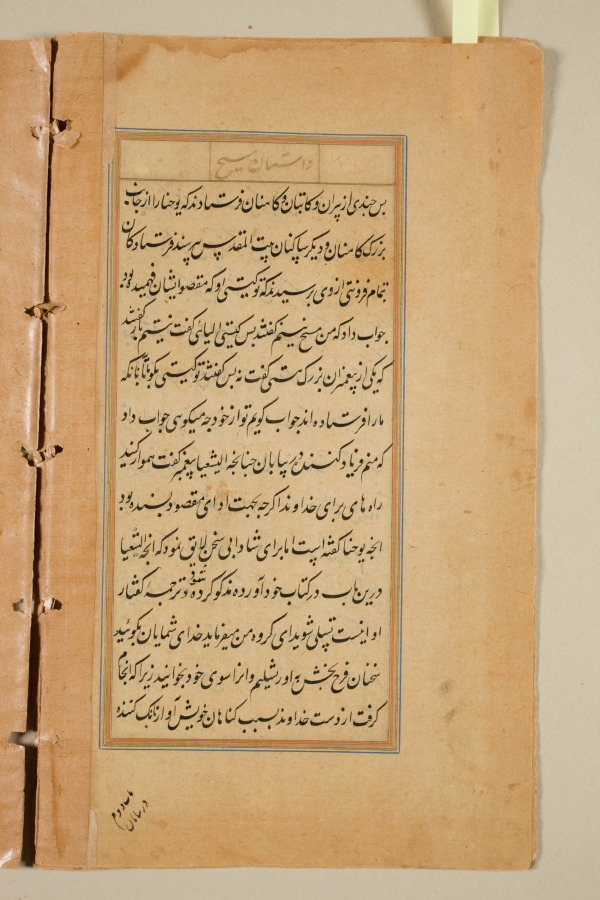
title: Text page from a Mirror of Holiness (Mir’at al-quds) of Father Jerome Xavier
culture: Mughal India, Allahabad, made for Prince Salim (1569–1627)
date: 1602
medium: Ink and gold on paper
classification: Manuscript